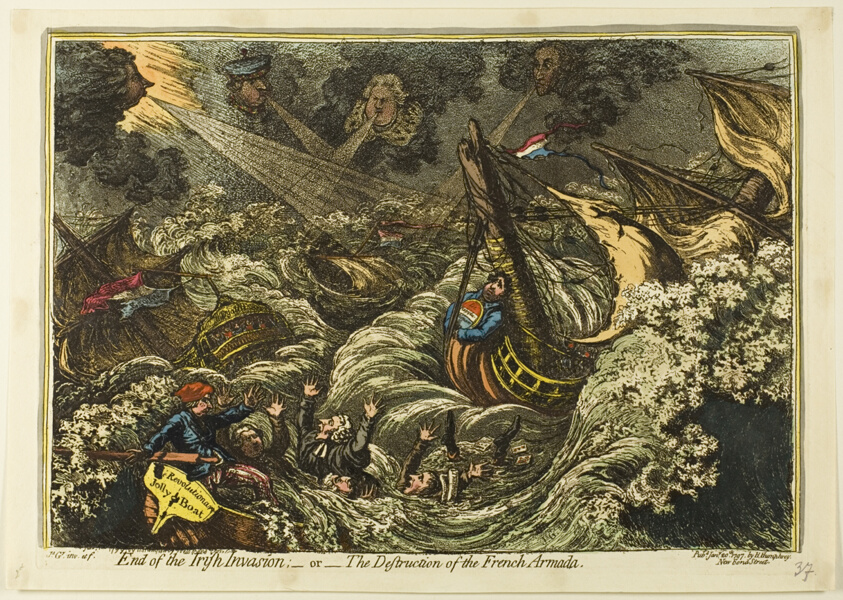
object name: Print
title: End of the Irish Invasion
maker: James Gillray (English, 1756-1815); published by Hannah Humphrey (English, c. 1745-1818)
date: published January 20, 1797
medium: Hand-colored etching and aquatint on paper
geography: England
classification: etching; print; prints and drawing